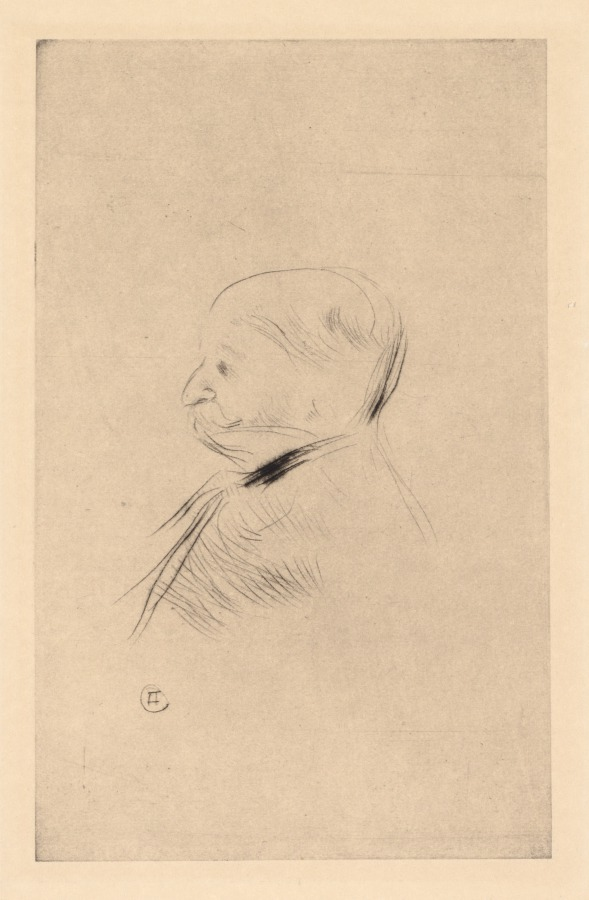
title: Portrait of a Man (Portrait d'un homme)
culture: France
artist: Henri de Toulouse-Lautrec (French, 1864–1901)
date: 1898 (printed 1927)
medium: drypoint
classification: Print